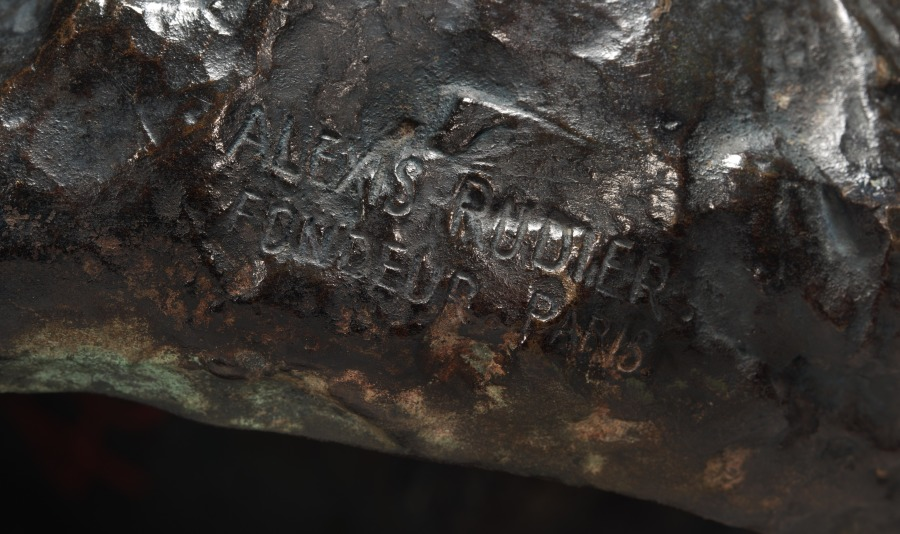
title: Mignon: Bust of Rose Beuret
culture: France, late 19th-early 20th century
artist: Auguste Rodin (French, 1840–1917)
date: c. 1867–1868 (original model)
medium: bronze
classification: Sculpture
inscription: Signed on shoulder to right: "A. Rodin"